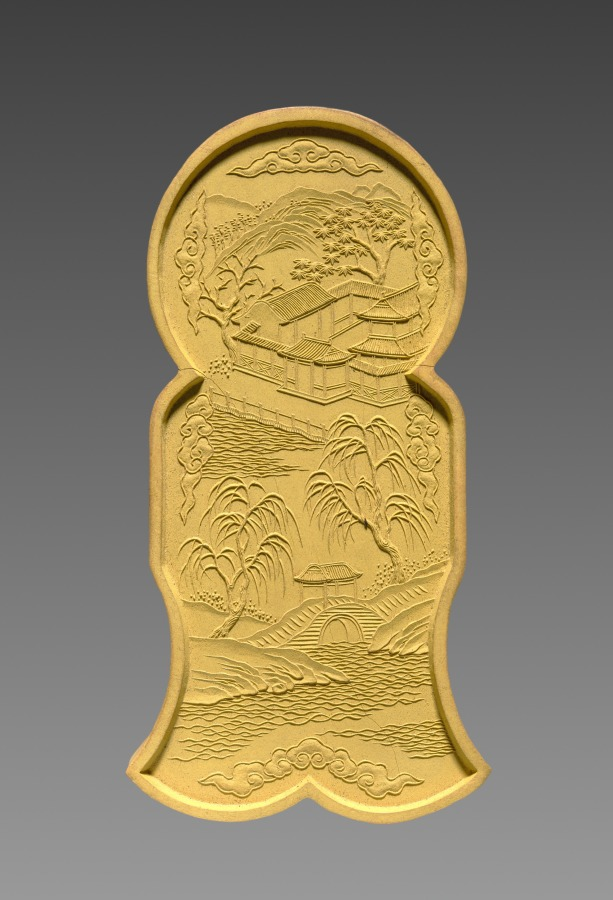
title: Ink Stick from an Imperially Commissioned Set of Ink Stick with Images and Poems of Famous West Lake Sites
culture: China, Qing dynasty (1644–1911), Qianlong reign (1736–95)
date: 1780–94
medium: Molded ink in yellow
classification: Miscellaneous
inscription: 乾隆年製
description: This is one of ten ink cakes of different shapes and colors stored in an exquisite lacquer box. Each is inscribed in gold with a poem by the Qianlong emperor, praising the ten famous sights of the Westlake in Hangzhou, near Shanghai. The Westlake is famous for its natural beauty; it was a favorite imperial destination and remains a tourist attraction today. Ink cakes (also called ink sticks) are dissolved with the addition of water and ground on the surface of a flat stone into liquid ink for painting and calligraphy. The precious ink cakes here, however, have never been used.